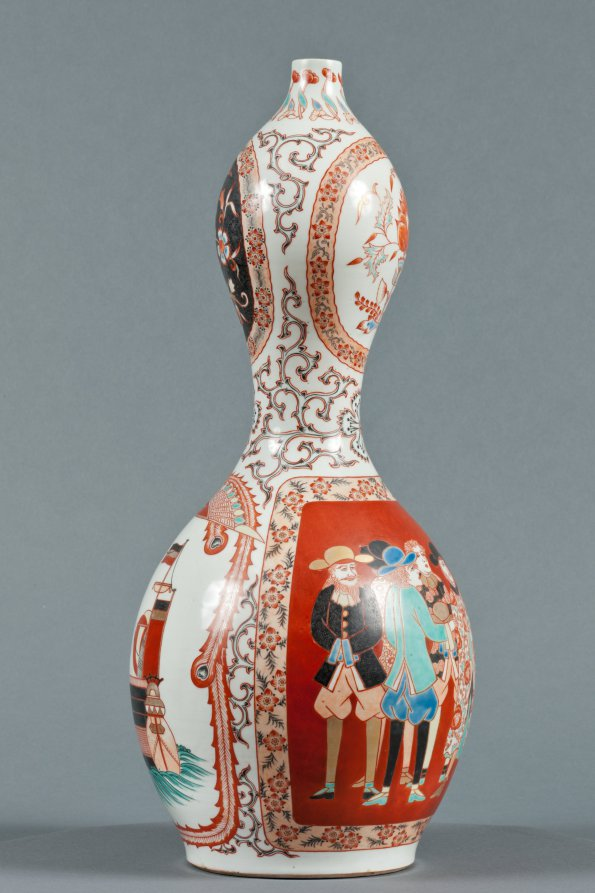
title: Bottle with Western Ships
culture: Japan, Edo period (1615–1868)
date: c. 1800–1868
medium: Porcelain with decoration in colored enamels and underglaze blue, overglaze enamels, and gold (Hizen ware, Arita type)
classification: Ceramic